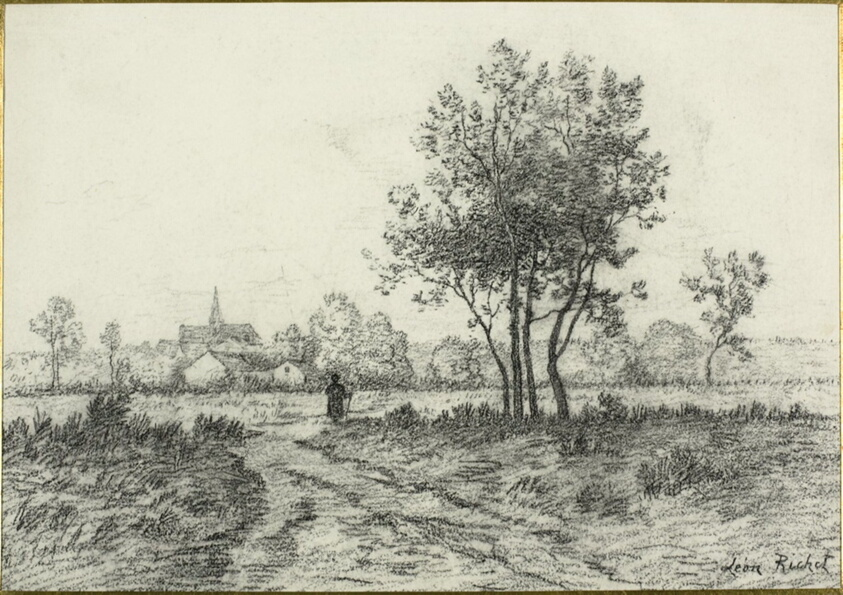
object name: Drawing and Watercolor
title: Landscape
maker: Léon Richet (French, 1847-1907)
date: c. 1875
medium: Charcoal on ivory wove paper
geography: France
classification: charcoal; drawings (visual works); prints and drawing